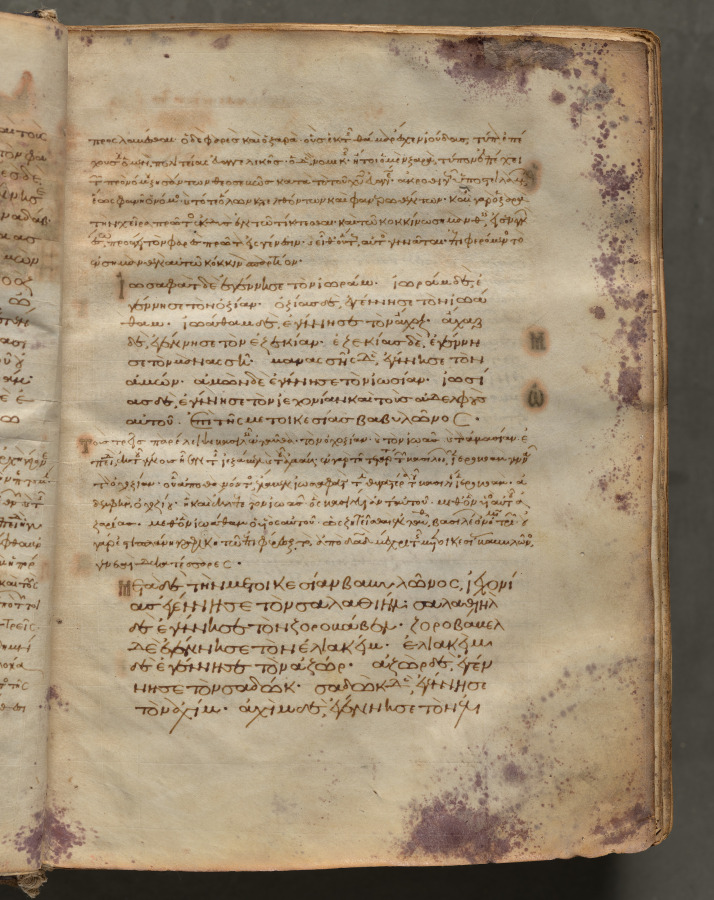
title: Text, folio 7 (recto), from a Gospel Book with Commentaries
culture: Byzantium, Constantinople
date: c. 1000–1100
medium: ink, tempera, and gold on vellum; leather binding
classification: Bound Volume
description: Each of the four gospels in this book opens on a page with brilliantly illuminated borders depicting the author of the text as well as birds-principally peacocks, symbols of the immortality of the soul-and fountains, representing the fountain of life and the salvation of the soul. This volume consists of 428 leaves with texts in Greek. Its level of sophistication suggests that it was probably written and decorated in a monastery in Constantinople.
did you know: Gospel Books were carried in procession through Byzantine churches.